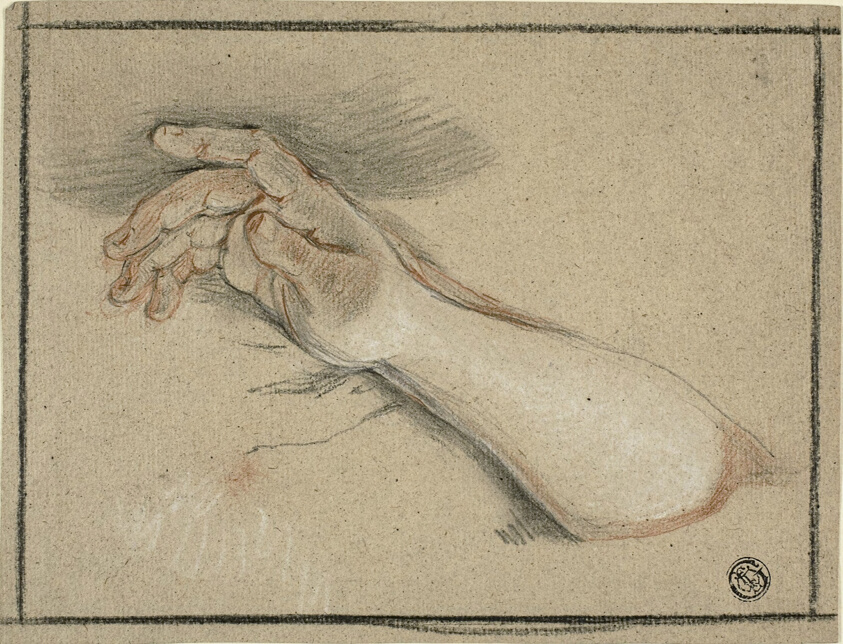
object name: Drawing and Watercolor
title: Hand and Forearm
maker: possibly Antoine Coypel; French, 1661-1722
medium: Red and black and white chalk, on tan laid paper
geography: France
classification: chalk; drawings (visual works); prints and drawing